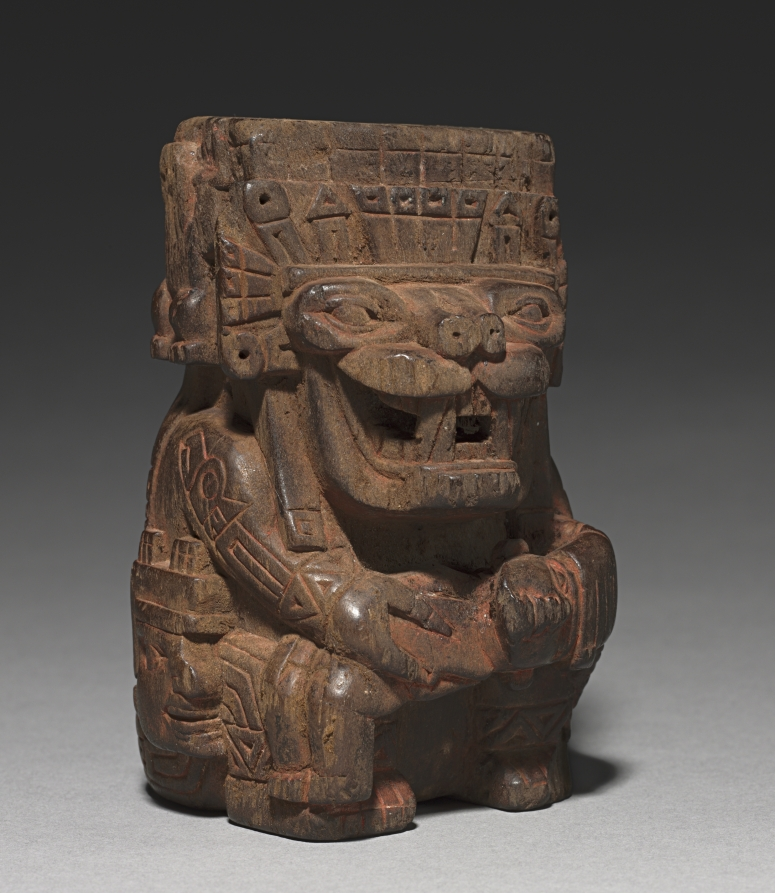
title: Sacrificer Container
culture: Central Andes, Wari style (600-1000)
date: 770–890 (radiocarbon date, 95% probability)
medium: wood and cinnabar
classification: Wood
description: This container assumes the shape of a magnificent, feline-headed, supernatural sacrificer who draws a knife across the throat of the human it holds in its lap. Severed human heads hang from the feline's belt and dangle by the trachea at the back of its headdress. Sacrifice had a place in Wari religious practice, probably as an unusual and exceptionally precious offering made to entice the benevolence of cosmic forces. Indeed, colonial-period Andean people believed that death was a prerequisite for the renewal of the world.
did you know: Traces of cinnabar, a toxic mercuric sulfide, are visible on the container's surface.